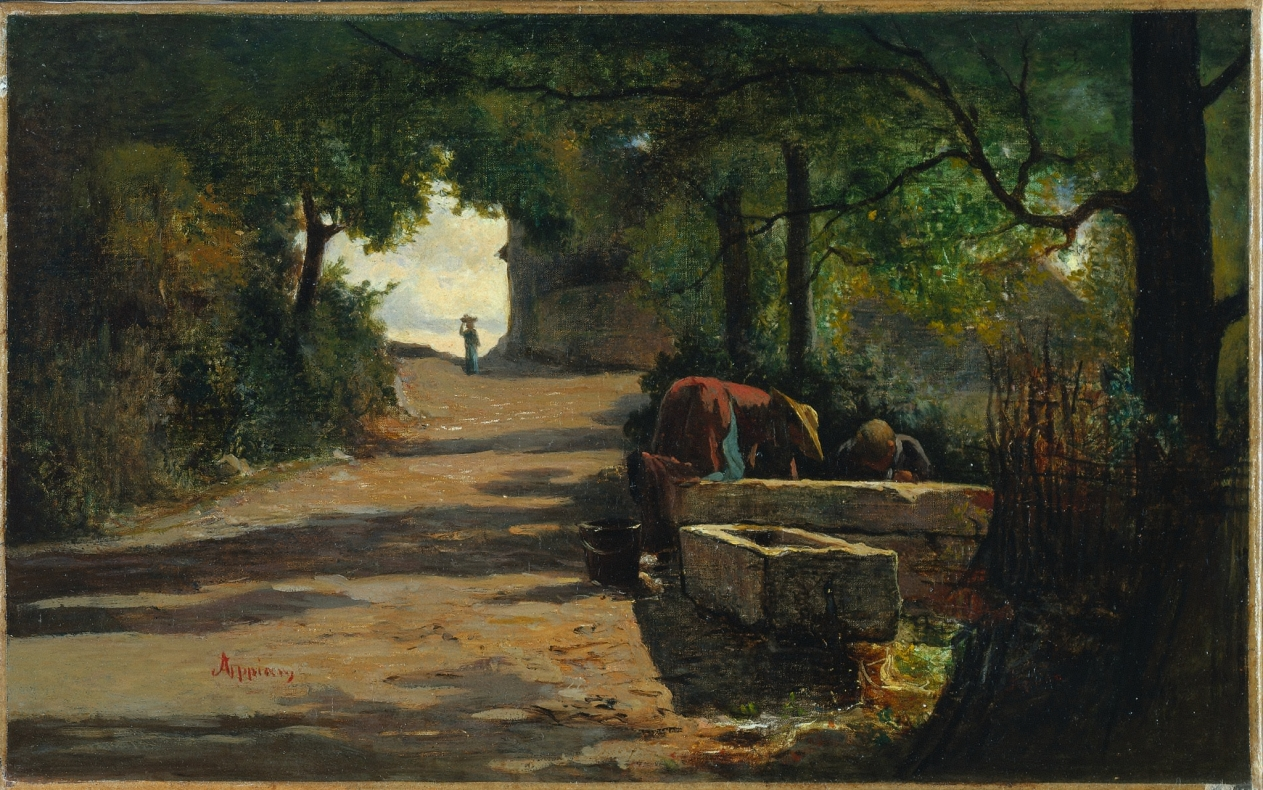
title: Well at the Side of a Road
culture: France, 19th century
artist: Adolphe Appian (French, 1818–1898)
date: 1860s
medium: oil on fabric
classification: Painting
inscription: Signed lower left foreground: Appian; lower right: Appian [false]